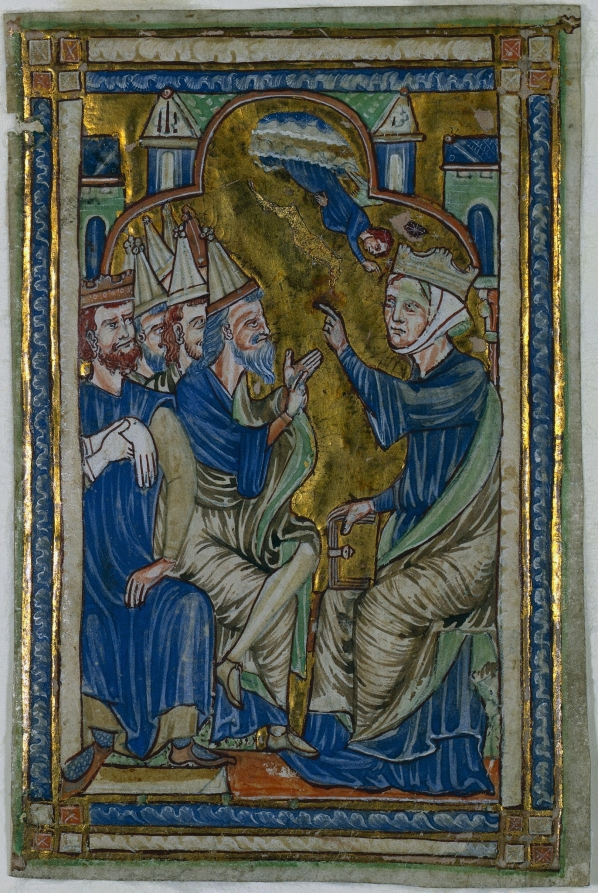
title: Miniature from a Compendium of Saints' Lives: Saint Catherine of Alexandria Disputing with the Fifty Philosophers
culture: Northeastern France, early 13th Century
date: c. 1200–1210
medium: tempera and gold on vellum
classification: Manuscript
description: This miniature depicts an incident in the life of Saint Catherine of Alexandria, one of the early martyrs of the Christian Church, who was renowned for her learning. In AD 305, the Roman emperor Maxentius (the crowned figure seated at the left) attempted to compel Catherine (seated at the right) to renounce her faith by forcing her to engage in a disputation or debate with the fifty pagan philosophers of Alexandria (signified by their pointed hats). The clever Catherine, however, succeeded in converting the philosophers to Christianity. In a rage, Maxentius ordered her execution. This miniature probably came from a manuscript of saints' lives or possibly a martyrology. The subject of this miniature would have appealed in the scholastic climate of northeastern France. Its dating and place of origin are supported by its strong stylistic relationship to the famous Ingeborg Psalter of about 1200, now in the Musée Condé in Chantilly.